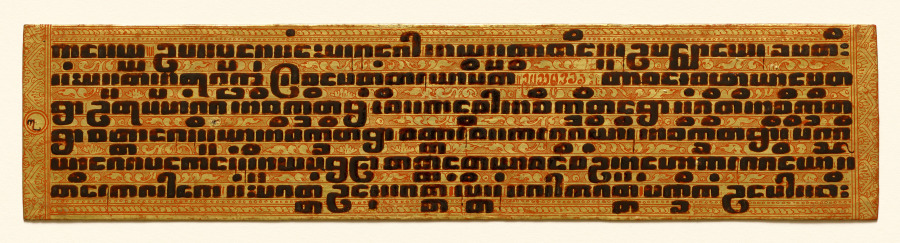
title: Text, folio 5 (verso) from a Kammavacha: Buddhist ordination text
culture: Myanmar (Burma)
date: 1800s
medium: Leaf: lacquer and gilding on cloth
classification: Manuscript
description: In premodern Burma, lay people commissioned lavishly ornamented manuscripts for ceremonial occasions, when officiants would read aloud from the text. Written in black lacquer, the text is in the language of Pali written in a Burmese script. It contains ordination rites and procedures for monastic ceremonies. The second to last page is covered with intricately drawn, winged celestial beings (nats) in gestures of praise. They fly amid intertwining vegetation—denoting bounty—that grows from serpentine forms that refer to rain clouds. Lionlike forms inhabit the space with them. The top and bottom covers are equally ornamented with jeweled floral patterning.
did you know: The Pali text of this manuscript is written in Burmese square script, which is also known as "tamarind seed script."